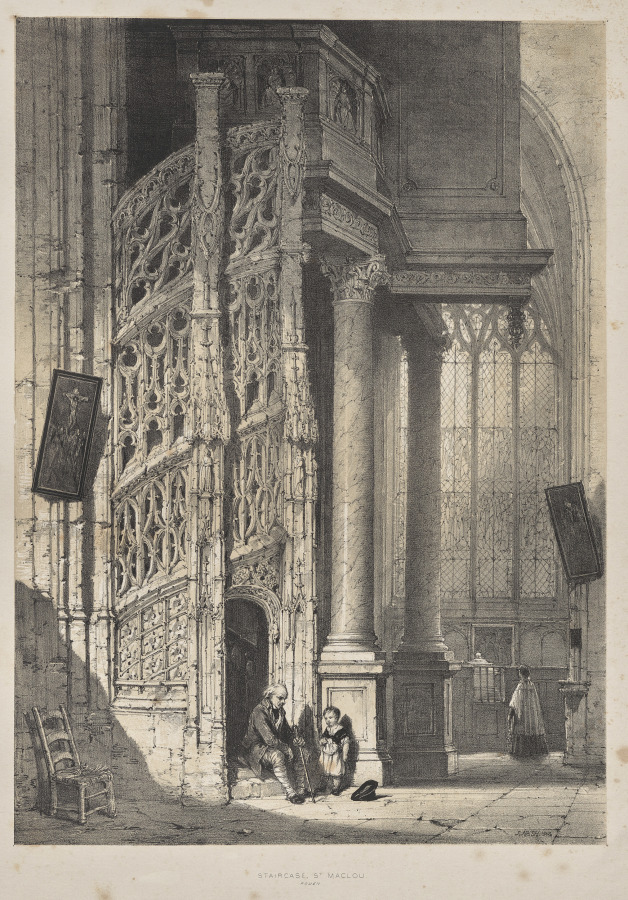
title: Architecture of the Middle Ages: Staircase, St. Maclou, Rouen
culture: England, 19th century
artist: Joseph Nash (British, 1808–1878)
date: 1838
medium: lithograph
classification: Print